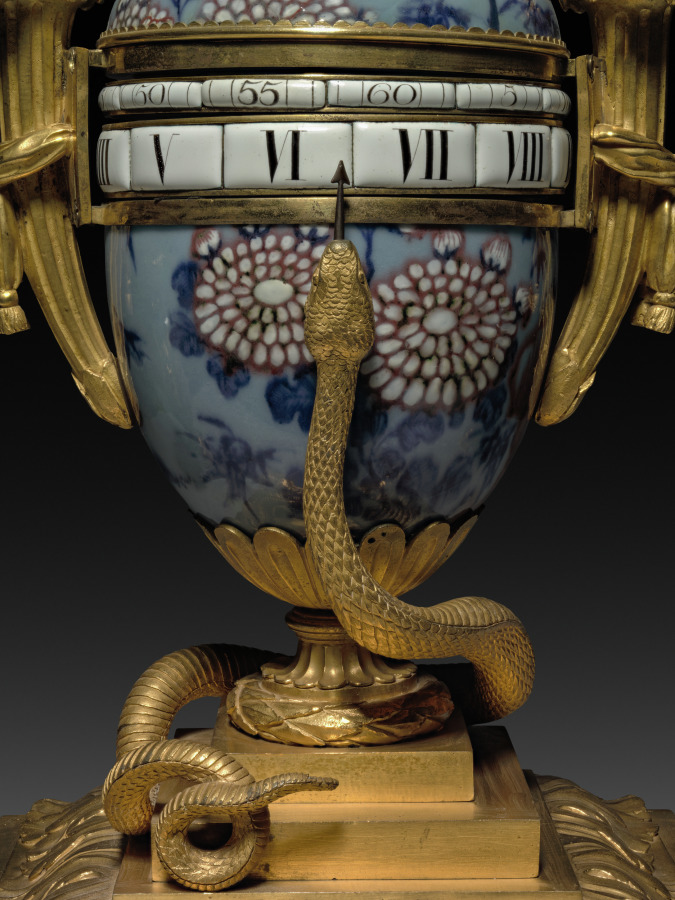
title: Clock for a Garniture Set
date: 1736–1770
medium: Chinese hard-paste porcelain, gilt bronze, enameled metal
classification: Furniture and woodwork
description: The fascination with Chinese porcelain among aristocratic circles increased during the reign of Louis XV. In reaction to the perceived excesses of elaborate naturalistic ornament of the 1750s, mount makers increasingly turned to neoclassical designs, known as Goût Grec (Greek taste) in the 1760s and 1770s. These beautifully chased gilt-bronze mounts feature classical Greco-Roman motifs such as lion masks, acanthus and laurel leaves, and pilasters.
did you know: A set of vases and clock, connected visually by the use of the same materials, often adorned a mantlepiece or the top of a large piece of furniture, such as a commode or console, within a room.